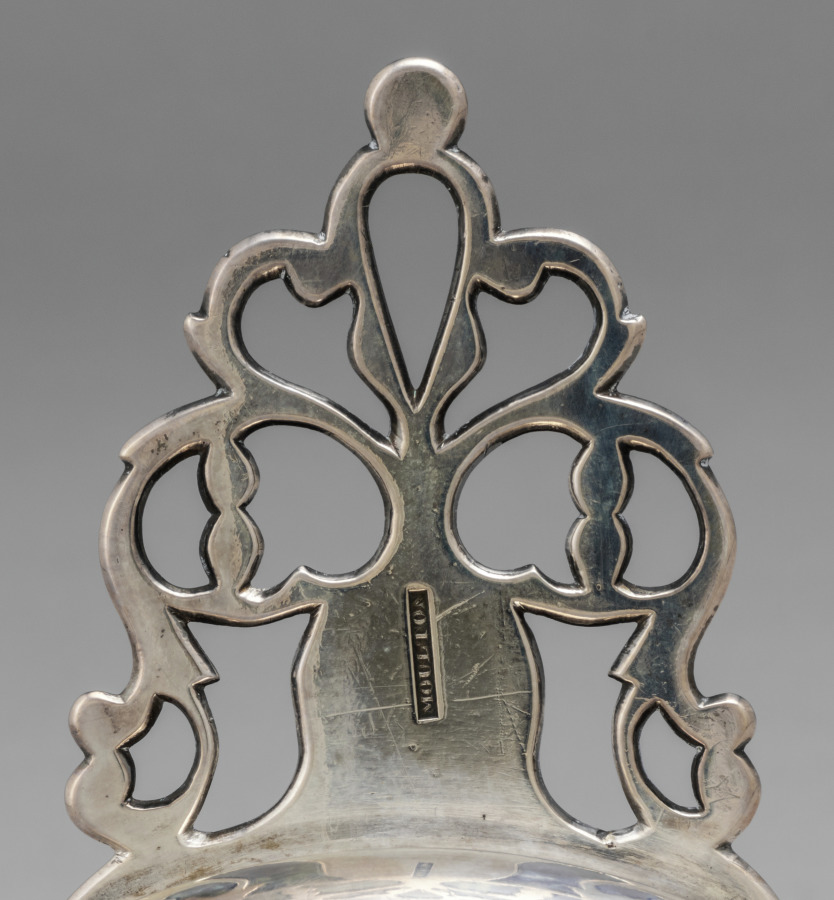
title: Porringer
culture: America, Massachusetts, Newburyport, late 18th-early 19th Century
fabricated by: William IV Moulton (American, 1772–1861)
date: c. 1800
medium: silver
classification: Silver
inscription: engraved "JFS" (or JFT) in bright-cut script on top of handle.